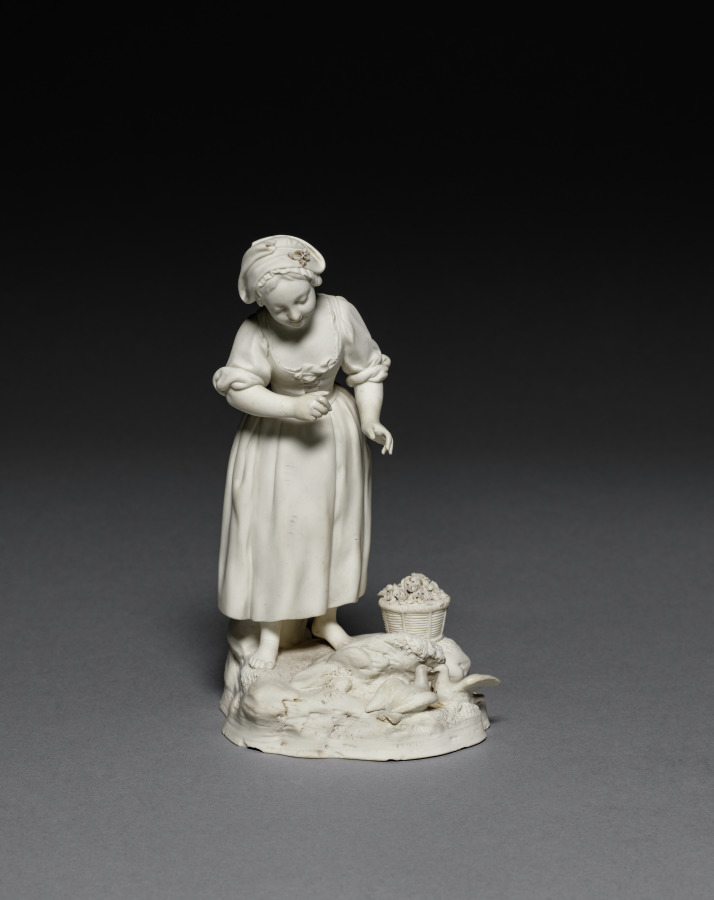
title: Curiosity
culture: France, Lunéville, 18th century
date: c. 1770–1775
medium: pipe clay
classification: Ceramic